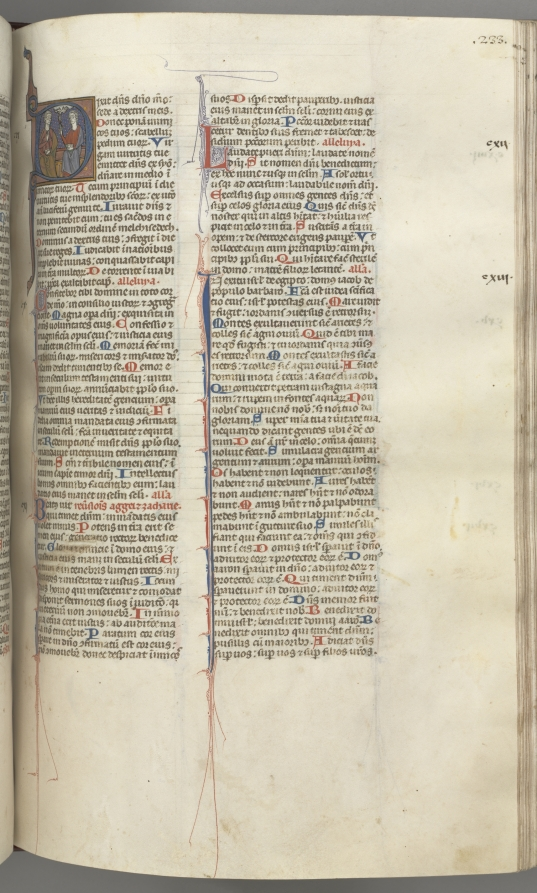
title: Fol. 233r, Psalm 109, historiated initial D, God the Father and Son, the Holy Ghost between them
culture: Southern France, Toulouse(?), 13th century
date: c. 1275–1300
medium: ink, tempera and gold on vellum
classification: Bound Volume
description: Biblical manuscripts were highly prized and important possessions of churches, monasteries, cathedral schools, and universities throughout medieval Europe. The biblical texts were known as the vulgate, the translations made by Saint Jerome in the fourth century from Hebrew and Greek into Latin, which became the definitive and official Latin version of the Roman Church. In the 13th century, the bible was, for the first time, produced as a single volume with an officially sanctioned sequence to its books and chapters as illustrated by this example. The very extensive decoration of this bible is arranged hierarchically to indicate the relative importance of the various texts so that full or almost full-page initials mark the openings of the first prologue, Genesis, and the first Gospel; historiated initials mark the beginning of each book and illuminated initials mark the Prologues.